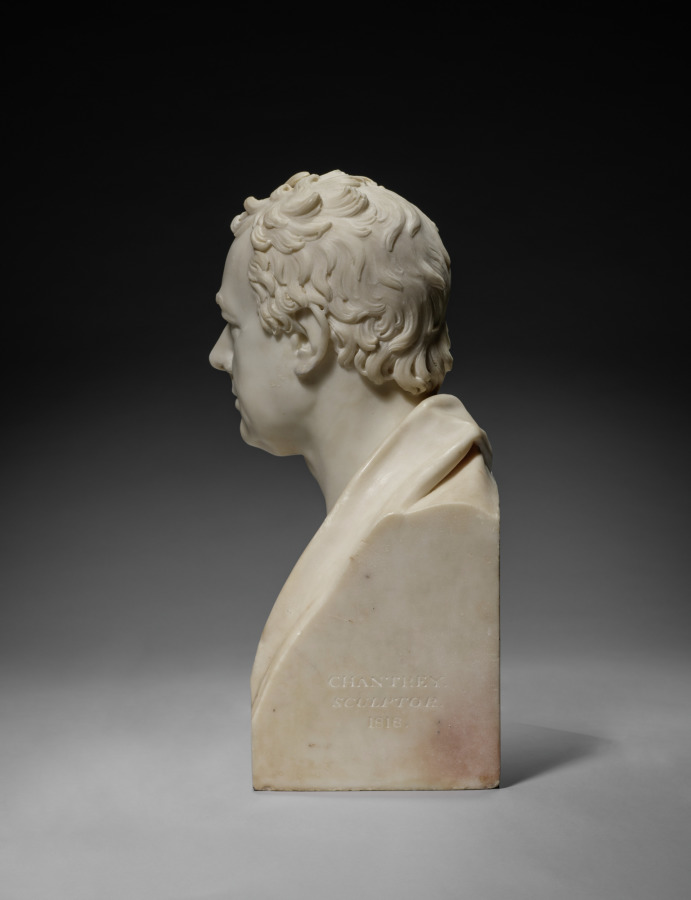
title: Sir H. C. Englefield, Bart.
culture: England, 19th century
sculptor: Francis Legatt Chantrey (British, 1781–1841)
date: 1818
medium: marble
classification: Sculpture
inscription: inscribed left side: Chantrey/Sculptor/1818; rear: Sir H. C. Englefield, Bart.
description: To modern eyes, a bare-chested portrait of a man in his mid-60s might seem undignified. However, it was fashionable for gentlemen of Englefield’s generation to be portrayed in this manner, deliberately referencing the antique sculptures of Roman statesmen they admired. As a Catholic, Englefield was barred from taking part in politics in England; however, he was a member of several clubs devoted to the amateur study of art, science, and history. Among these were the Society of Dilettanti, which championed the works of antiquity and promoted the creation of modern art in the same spirit—like this marble bust by celebrated sculptor Francis Legatt Chantrey.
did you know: Initially, Chantrey tried to establish himself as a portrait painter. After 1805, he painted only on occasion and from 1811–20, he became the leading portrait sculptor in Regency Era Great Britain.